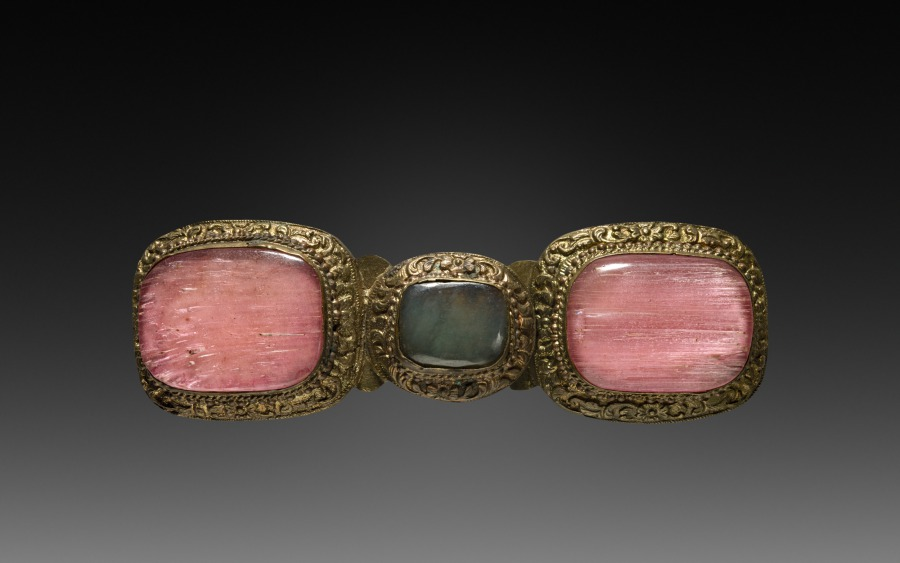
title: Buckle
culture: China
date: 1900s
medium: Brass, engraved and set with pink glass and jade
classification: Jewelry